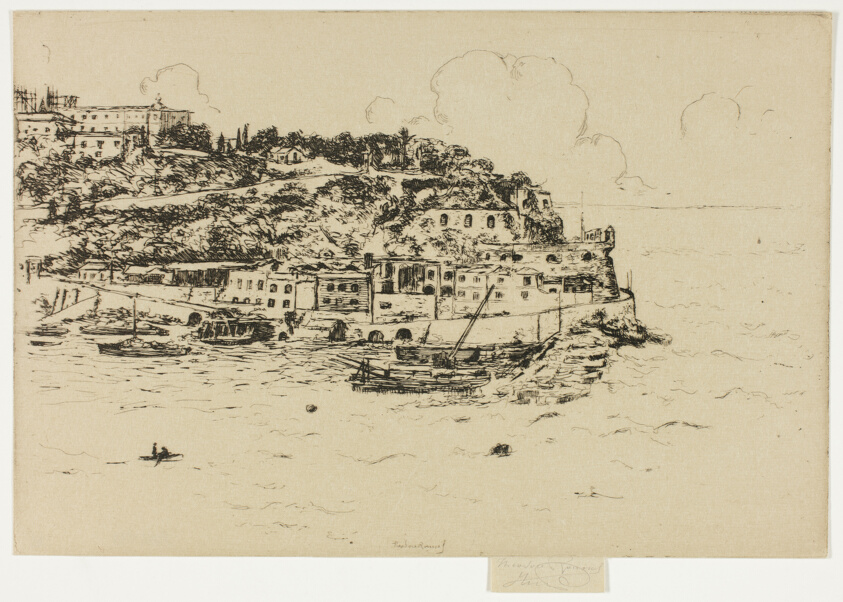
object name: Print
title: Monaco from La Condamine, Monte Carlo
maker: Theodore Roussel (French, worked in England, 1847-1926)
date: 1905–06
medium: Etching in black on cream wove paper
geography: England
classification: etching; paper; print; prints and drawing